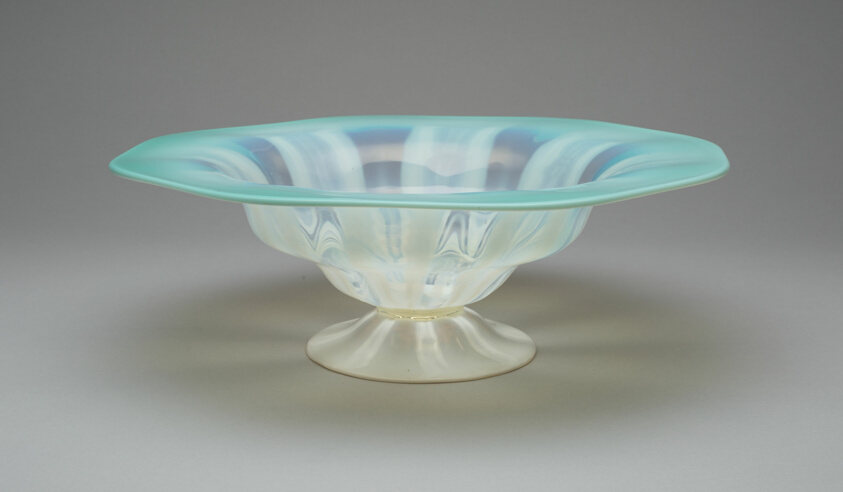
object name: Glass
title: Bowl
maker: Tiffany and Company (American, founded 1837); New York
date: 1896–1915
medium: Glass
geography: United States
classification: bowl; glass; american decorative arts; american arts; decorative arts